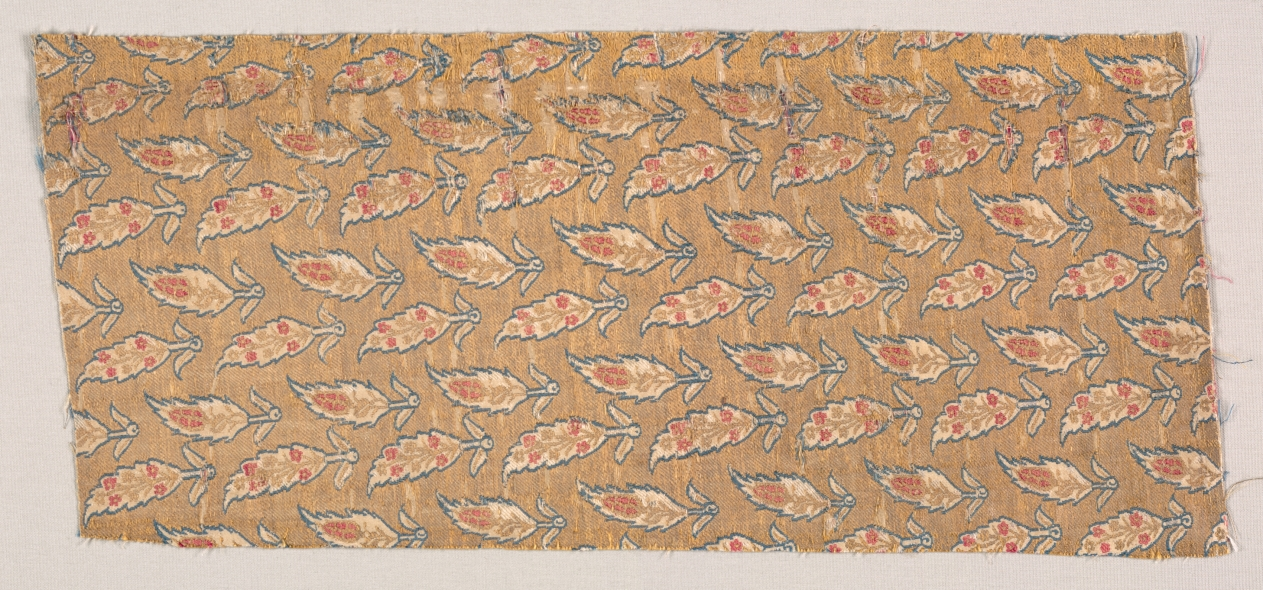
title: Textile Fragment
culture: Turkey, Anatolia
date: 17th century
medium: brocaded silk with metal thread weft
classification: Textile